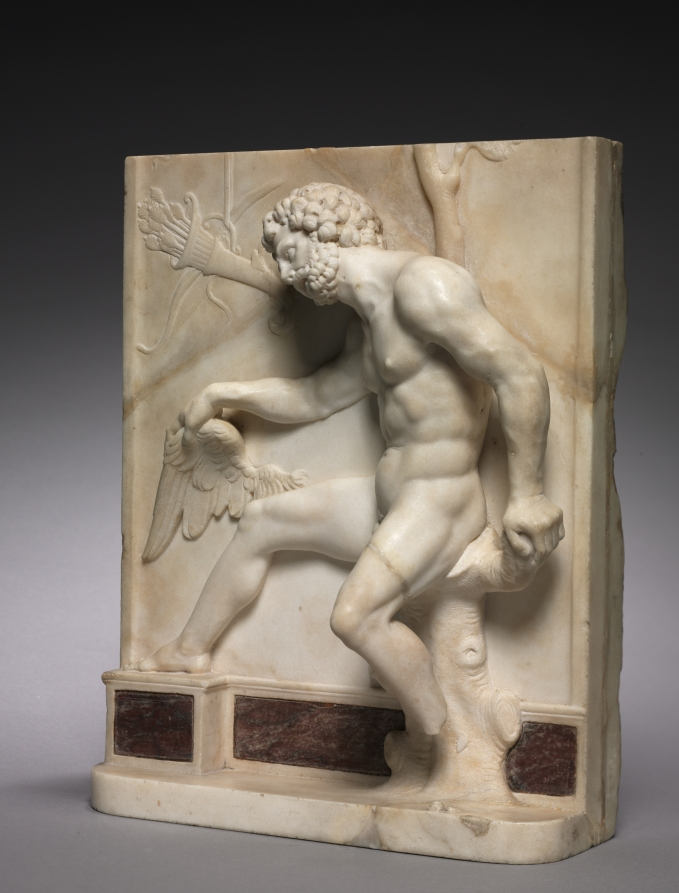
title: Philoctetes on the Island of Lemnos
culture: Italy, 16th century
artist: workshop of Giovanni Maria Mosca (Italian, 1495/99–1574)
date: c. 1510–1515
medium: marble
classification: Sculpture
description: A snake bit the Greek warrior Philoctetes en route to the Trojan War. The stench of the infected wound led the ship’s crew to abandon him on the island of Lemnos, where he fans the agonizing injury with a bird’s wing. The warrior’s noble suffering in the face of tremendous pain would have been a classical model of stoic composure, highly valued in Renaissance court culture.